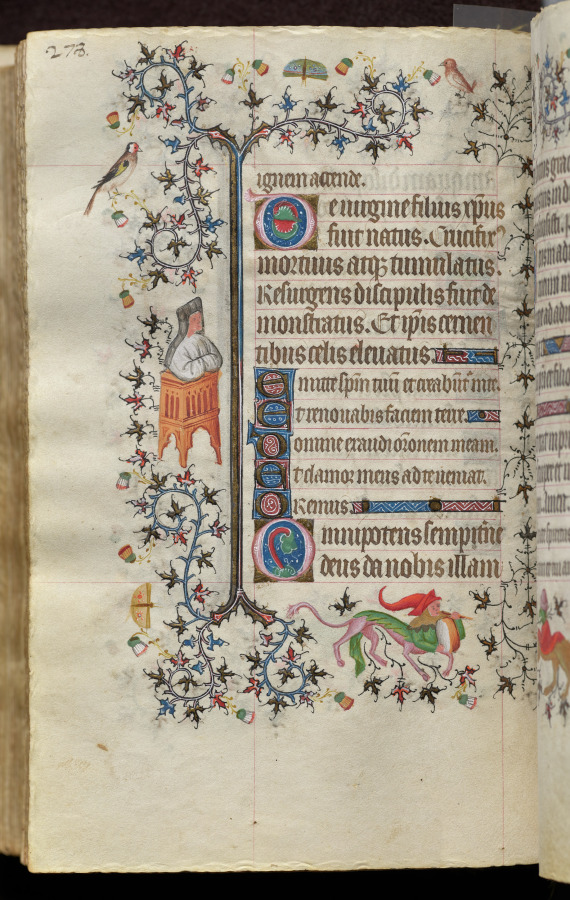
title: Hours of Charles the Noble, King of Navarre (1361-1425): fol. 139v, Text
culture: France, Paris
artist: Master of the Brussels Initials and Associates (French)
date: c. 1405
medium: ink, tempera, and gold on vellum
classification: Bound Volume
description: This precious volume was obviously highly prized by its owner, the French-born King of Navarre, who had his coat of arms painted on no less than twenty folios. Rather than directly commissioning this manuscript from a specific workshop, it seems that Charles the Noble acquired his book of hours -- perhaps ready-made for the luxury market -- while on a trip to Paris in 1404-05. A collaborative effort, six painting styles are evidenced within the pages of this codex, those of two Italians, two Frenchmen, and two Netherlanders. The painter who was responsible for the planning and decoration of the book, and who produced seventeen of the large miniatures, was a Bolognese artist known as the Master of the Brussels Initials. His principal assistant, responsible for most of the borders, was a Florentine who signed his name "Zecho" da Firenze on folio 208 verso.